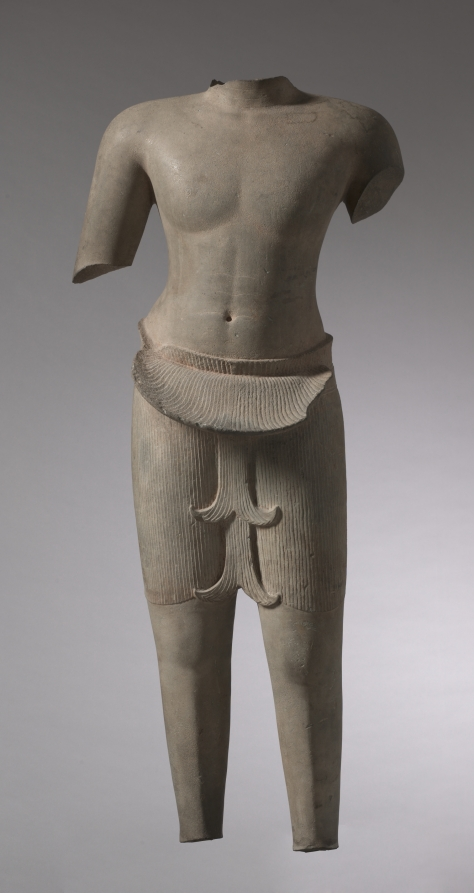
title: Male Deity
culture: Cambodia, Koh Ker-Khleong style, 10th century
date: 925–50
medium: sandstone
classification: Sculpture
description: The distinctive swath of pleated cloth and the anchor-shaped ends of the lower garment suggest that this sculpture was made when this method of wrapping the sampot was fashionable. During that time, Cambodian temples were dedicated to Hindu deities, whose images were dramatically installed alone on a pedestal in a temple's sanctum. When consecrated, gold tokens were installed under the pedestal; many sculptures were broken when people toppled them to get the gold.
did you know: This male deity seems to be striding with his left leg advanced subtly forward.